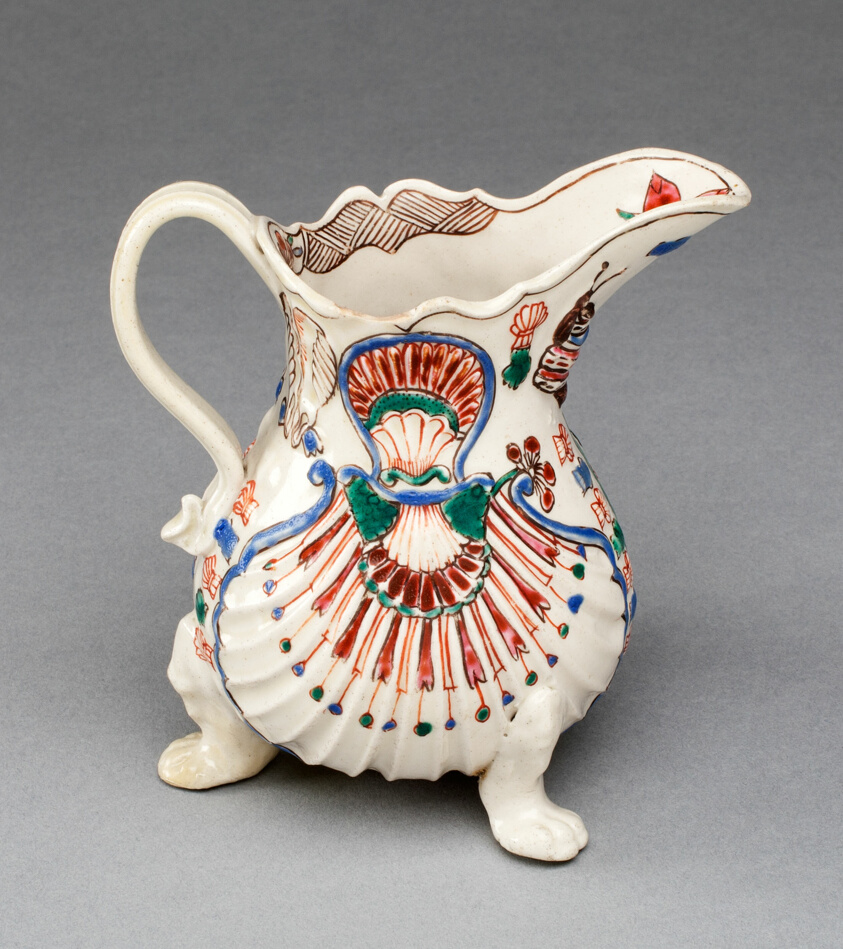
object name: Ceramics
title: Creamer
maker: Staffordshire, England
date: c. 1760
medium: Salt-glazed stoneware, polychrome enamels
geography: Staffordshire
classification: salt-glazed stoneware; european decorative arts; ceramics; stoneware